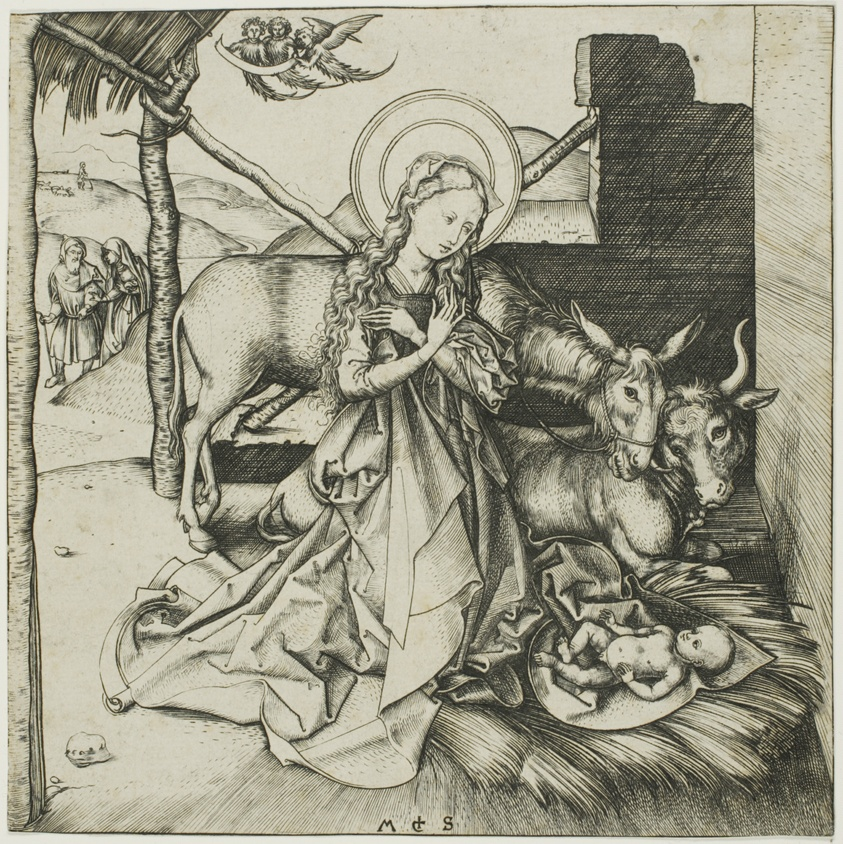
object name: Print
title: The Nativity, from the Life of Christ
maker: Martin Schongauer (German, c. 1430/50-1491)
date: c. 1474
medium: Engraving in black ink on cream laid paper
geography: Germany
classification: engraving; print; prints and drawing